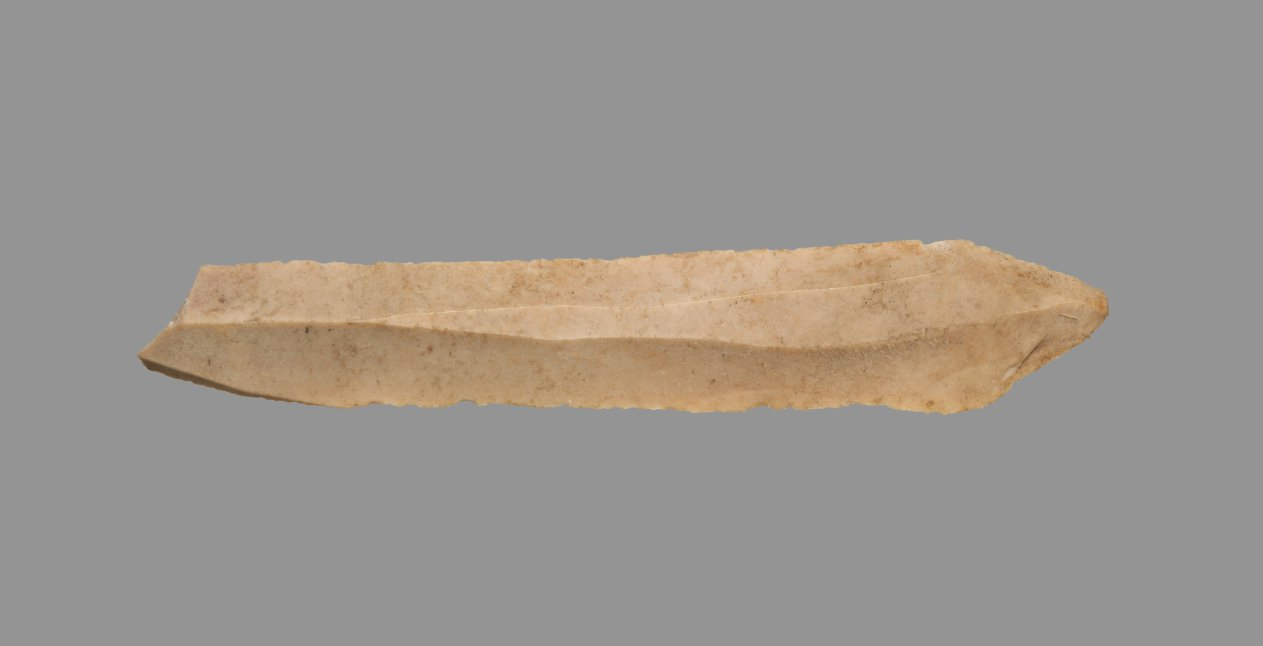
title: Sickle Blade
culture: Egypt, Middle Kingdom (2040–1648 BCE), Dynasty 12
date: 1980–1801 BCE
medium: flint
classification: Implements